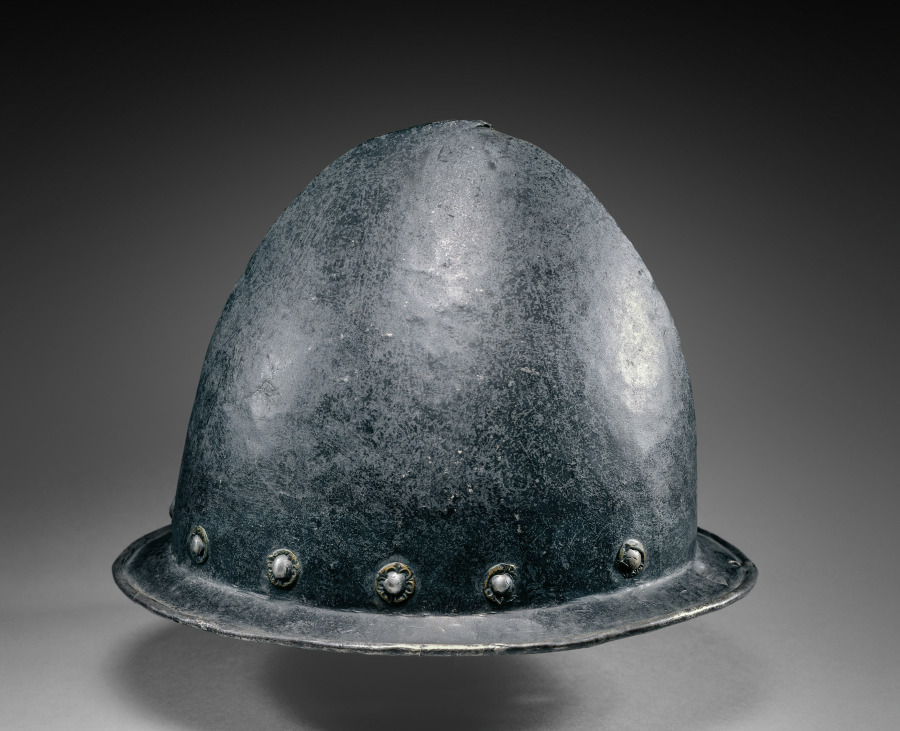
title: Cabasset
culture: Italy, 16th century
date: c. 1570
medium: steel, black paint, brass rosette rivets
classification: Arms and Armor